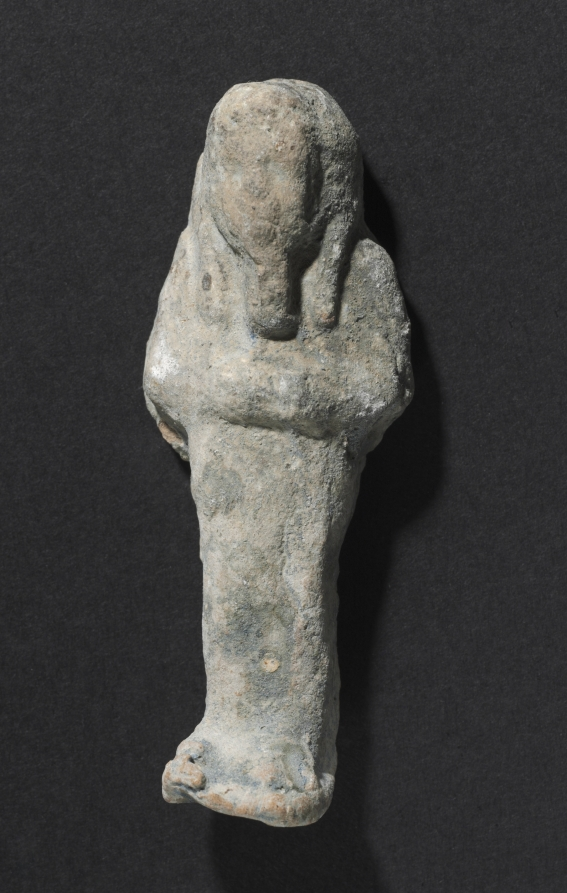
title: Shawabty of Ditamenpaankh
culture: Egypt, Late period (715–332 BCE), Dynasty 25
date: 715–656 BCE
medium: terracotta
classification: Funerary Equipment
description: High demand for shawabtys in the Late Period, a time when as many as 400 or more shawabtys were placed in the tomb with the deceased, gave rise to a specialized container for storing them: the shawabty box. This example is inscribed for the lady of the house, Ditamenpaankh, and was probably one of a pair originally made for her. The single-masted boat on the box's lid is perhaps an allusion to the pilgrimage of the deceased to the holy city of Abydos, the cult city of Osiris, king of the dead. The shawabtys inside are crude, mass-produced examples cast in an open mold. Made of terracotta, their blue paint imitates more costly shawabtys made of faience. As for the shawabty spell, it has been removed from its traditional location on the shawabty's front and relocated onto the sides of box, where it needed only to be written once, thus expediting production.